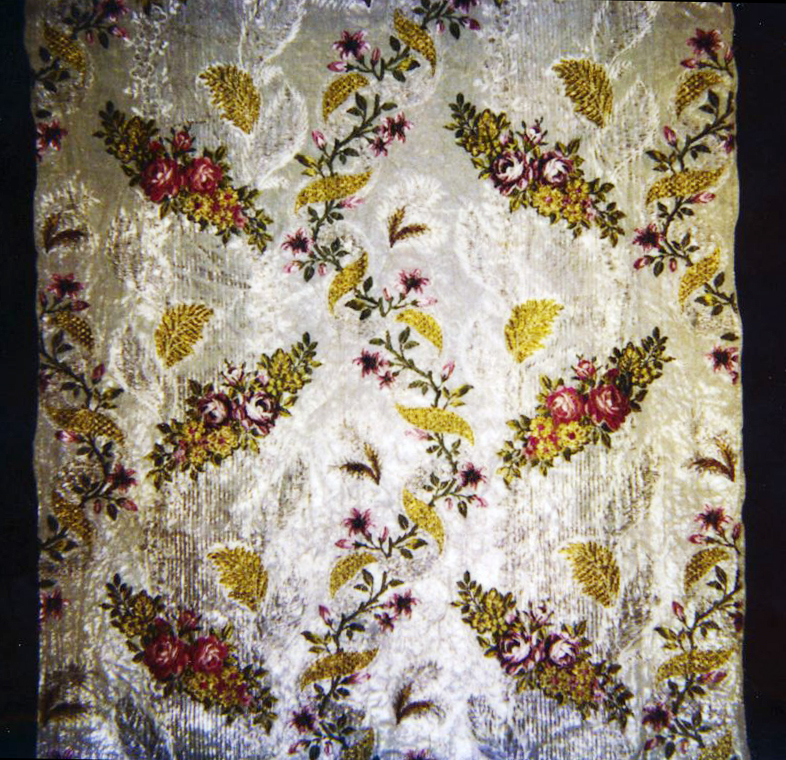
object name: Textile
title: Panel from a Skirt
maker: England, Spitalfields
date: c. 1753/55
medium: Silk, gilt-and-silvered-metal strip, and gilt-metal-strip-wrapped silk, plain weave with patterning and brocading wefts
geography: Spitalfields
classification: textile; weaving